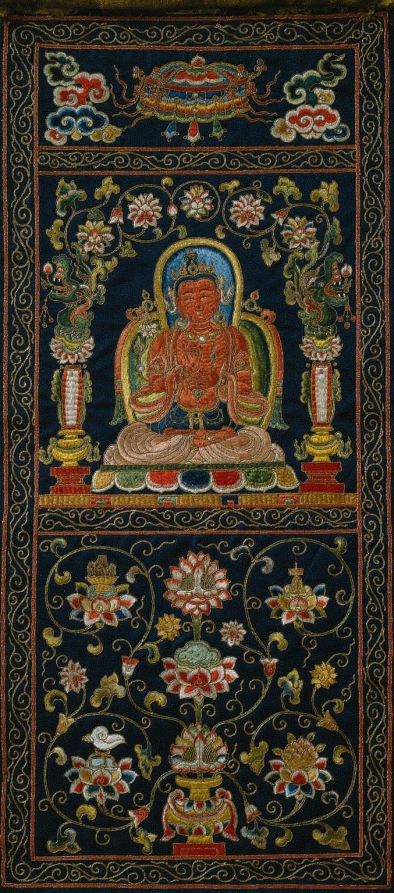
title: Thangka with the Seventh Bodhisattva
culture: China, Ming dynasty (1368–1644)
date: 1368–1424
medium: Silk and gold thread on silk satin ground, embroidery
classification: Embroidery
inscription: Penned on the reverse is a Tibetan inscription that translates as "the Seventh Bodhisattva."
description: In remarkably pristine condition, this embroidery is from a dispersed set that included images of protectors and bodhisattvas. The embroidery technique and pictorial style are Chinese, but the subject matter and the type of devotional hanging called a thangka are associated with Tibetan Buddhism. Historical records state that during the early Ming dynasty (1368–1644), gifts of Buddhist art were sent from China to Tibet, since relationships between Chinese rulers and Tibetan monastic patriarchs were strong and amicable during this time. A Tibetan inscription on the back notes that this figure is the “seventh bodhisattva,” indicating the position in which it would have hung in a temple hall. Odd-numbered works were hung on one side of the main image, and even-numbered works on the other, counting from the center.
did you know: The bodhisattva is flanked by two columns, each topped with a makara, a fanciful water creature whose tail becomes lotus scrolls forming an arch over the bodhisattva.